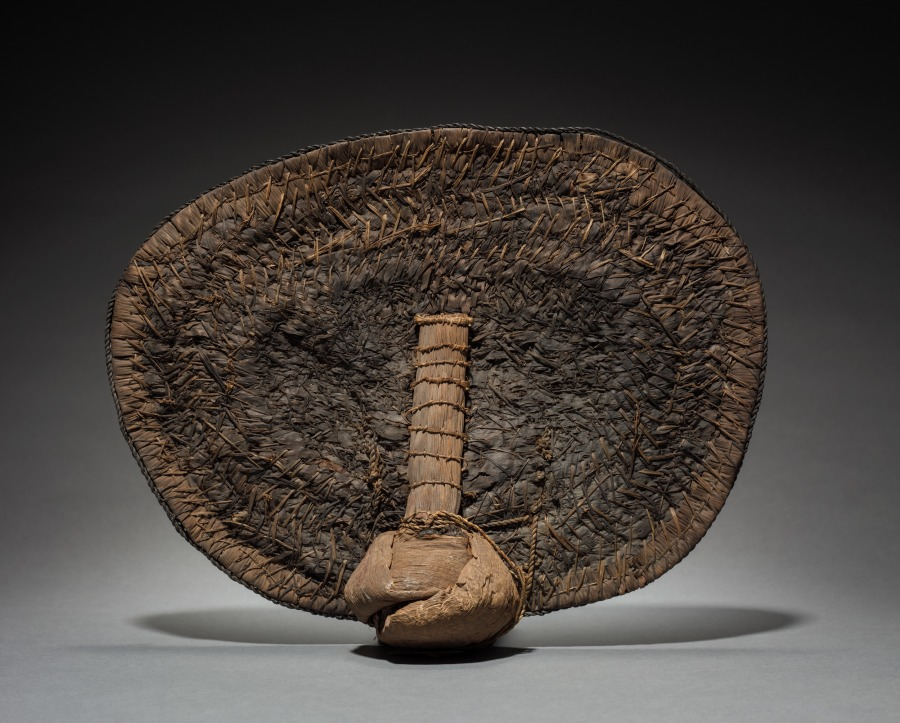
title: Back Skirt / Sitting Pad (negbe)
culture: Africa, Central Africa, Democratic Republic of the Congo, Mangbetu-style maker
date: before 1929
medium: Plant fibers and dye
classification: Garment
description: Egbe (singular: negbe) were fashionable and practical garments aristocratic Mangbetu women made for special occasions. Worn over a skirt, it tied onto a girdle along with a frontal “apron.” The curved interior piece rested on the lower back. Thickly woven, flexible natural fibers bent with the body, cushioning the wearer’s behind when sitting. When the woman was standing, the decorated flat portion faced outward, showing off bold geometric motifs. Egbe were among items sold to foreigners at the Mangbetu king’s encouragement as the Mangbetu actively constructed their self-image for outsiders during the 1920s and 1930s.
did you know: A contemporary fashion in 1929, when it was purchased or collected, this negbe is now a historical document of past styles.